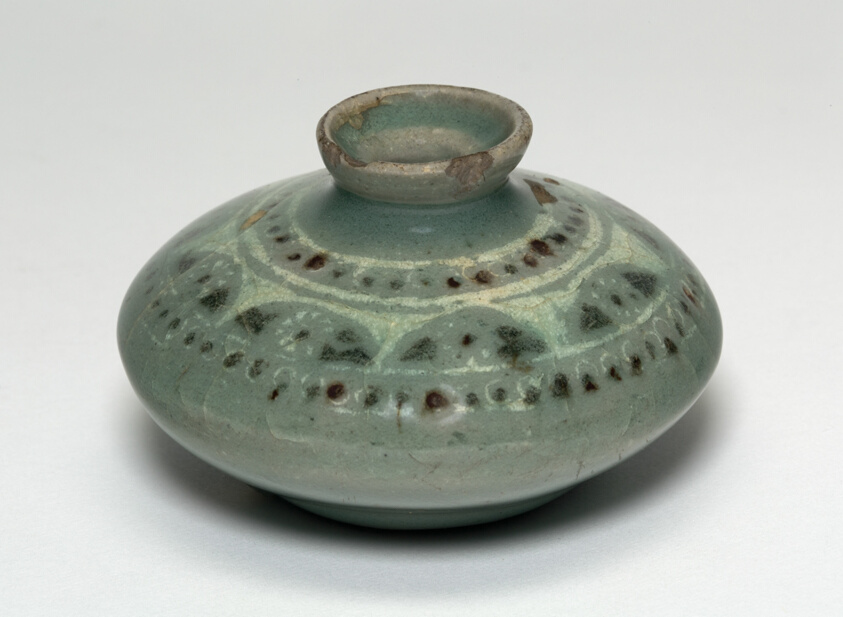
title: Oil Bottle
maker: Korea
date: Goryeo dynasty (918–1392), late 12th century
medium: Celadon-glazed stoneware with underglaze inlaid decoration of black and white clays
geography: Korea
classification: ceramics; asian art